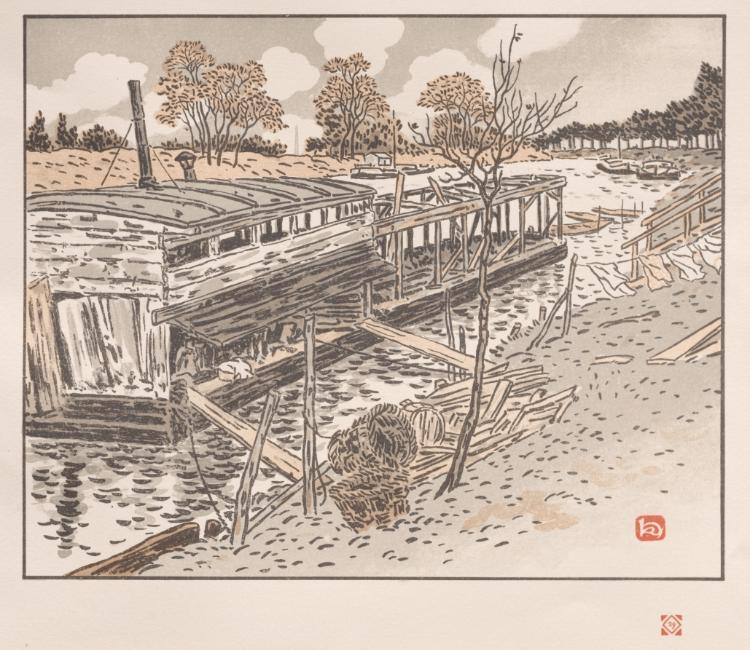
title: From Bas-Meudon, Old Lavoir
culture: France, early 20th century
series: Thirty-Six Views of the Eiffel Tower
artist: Henri Rivière (French, 1864–1951)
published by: Printed by Verneau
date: 1902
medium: color lithograph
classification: Print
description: A close friend of Edgar Degas’s and a prolific printmaker, Henri Rivière set out to fully represent the Paris of his day through a series of 36 widely varying perspectives. Each image was united by the presence of the distinctive Eiffel Tower. The city’s laundry industry features throughout the prints, which centers on a weathered wash boat in Bas-Meudon, an industrial suburb both physically and mentally removed from Paris, barely visible in the distance.